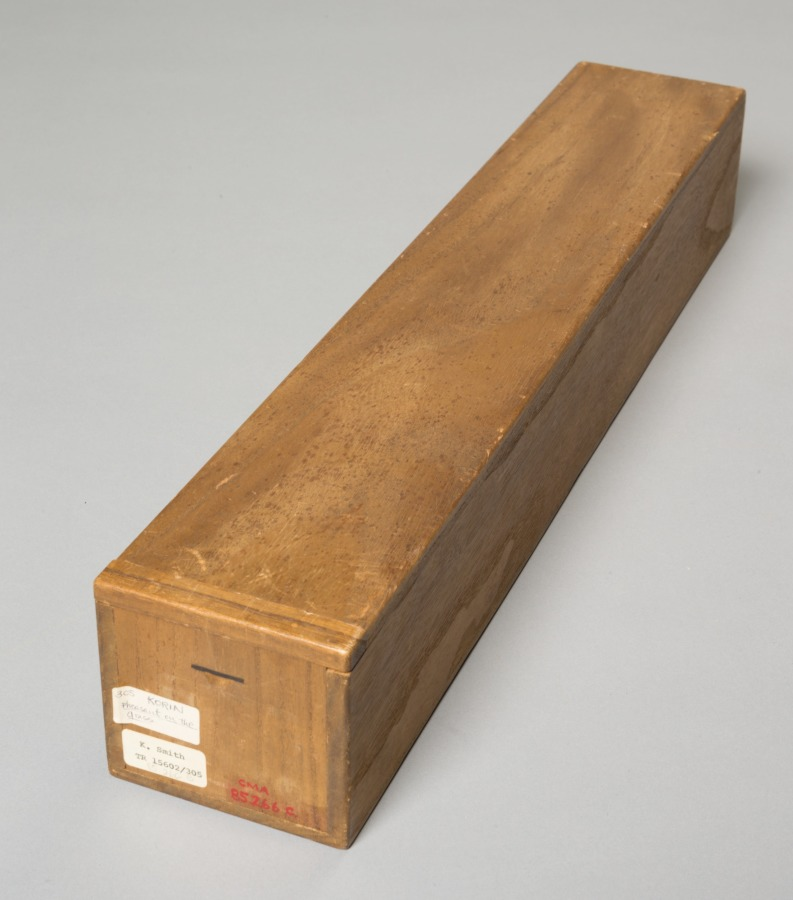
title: Pheasant and Grasses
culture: Japan, Edo period (1615–1868)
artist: attributed to Ogata Kōrin (Japanese, 1658–1716)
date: late 1600s–early 1700s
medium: hanging scroll; ink and color on paper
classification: Painting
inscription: two seals of artist, lower right.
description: Korin was a founder of the Rimpa (decorative) school of painting and was a keen observer of nature. The pheasant is often associated with autumn.